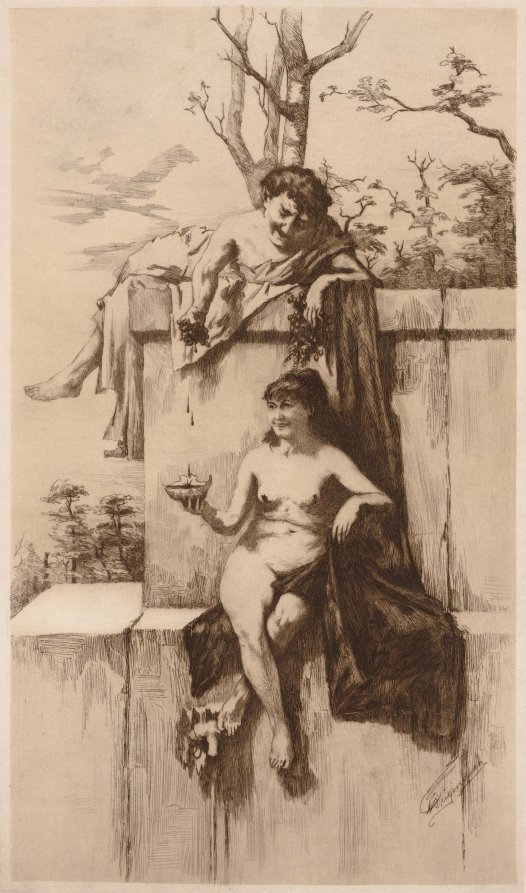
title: Bacchanalian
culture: America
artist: Herman Frederick Deigendesch (American, 1858–1921)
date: 1884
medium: etching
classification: Print